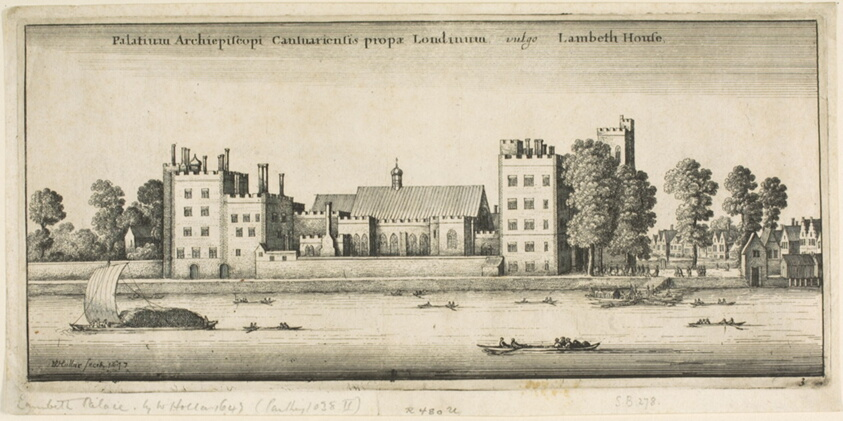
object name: Print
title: Lambeth Palace from the River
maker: Wenceslaus Hollar (Bohemian, 1607-1677)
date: 1647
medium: Etching on ivory laid paper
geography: Bohemia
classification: etching; print; prints and drawing